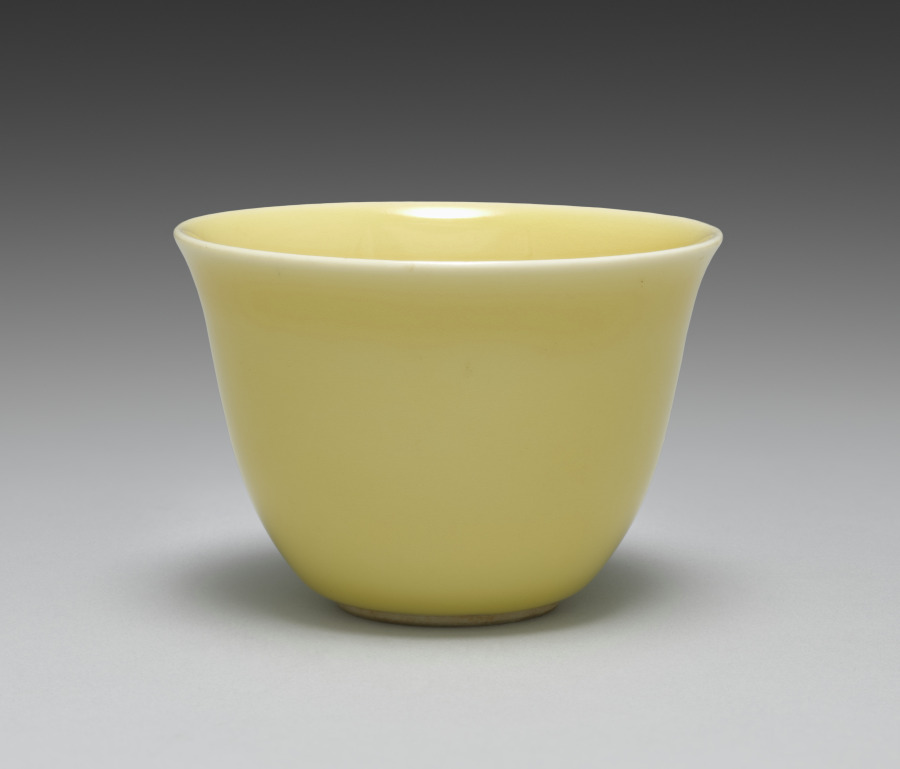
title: Cup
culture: Japan, Taishō period (1912–26) or Shōwa period (1926–89)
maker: Seifū Yohei IV (Japanese, 1872–1951)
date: 1914–46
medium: porcelain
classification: Ceramic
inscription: 清風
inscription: 清風造 【印】成山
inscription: 清風盧人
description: Like his father, Yohei IV also produced works with red or yellow monochrome glazes. His yellow-glazed works include this set of five drinking cups, a pair of sake pourers CMA 2022.216, and a sweets bowl molded into the shape of a chrysanthemum CMA 2022.218.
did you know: Seifū Yohei IV learned the ceramics industry from his father and painting from Tanomura Shosai.